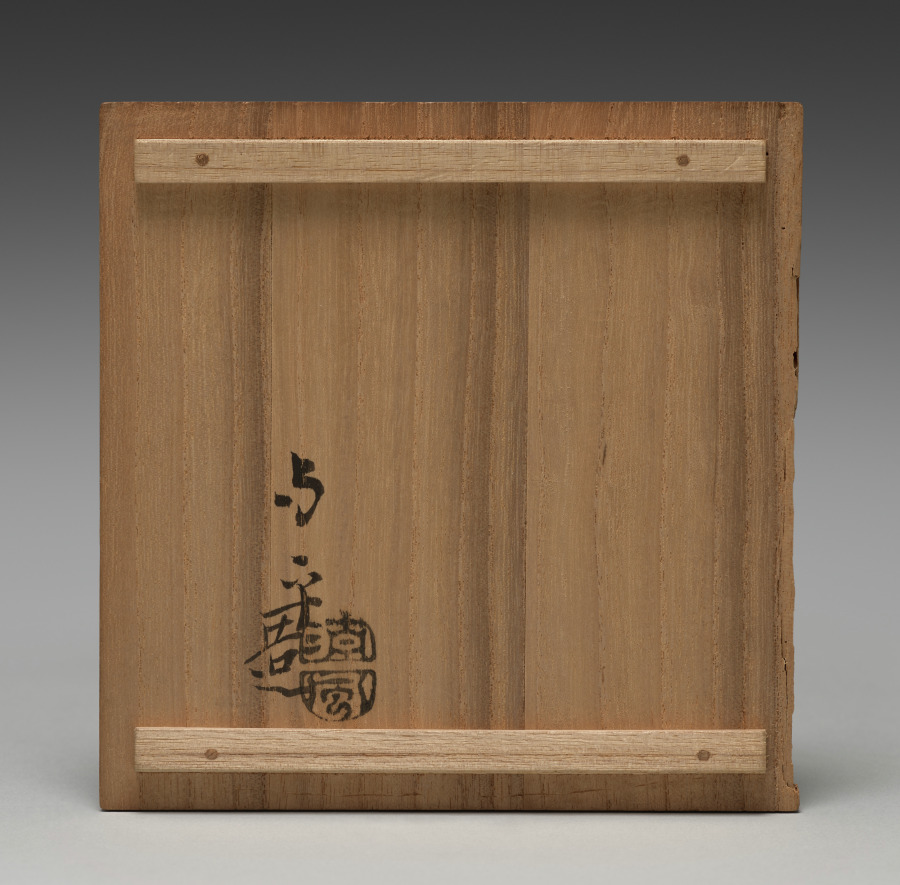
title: Box with Butterfly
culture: Japan, Meiji period (1868–1912)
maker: Seifū Yohei I (Japanese, 1801–1861)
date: 1855–57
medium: Porcelain with underglaze blue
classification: Ceramic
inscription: 清風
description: This sturdy box, with comparatively thick walls and resulting heft, is sparsely decorated with a single butterfly motif in dark underglaze blue cobalt in one corner of the lid and with repeating floral patterns along the lid and base. Single broken lines of underglaze blue define the edge of the box lid’s top where it curves to meet the sides and again where it meets the base of the box. Another blue band runs around the upper rim of the base where it meets the lip, left unglazed for a better grip of the lid when the box is closed. Yohei I’s signature on the center of the recessed base is set within a wide blue square. The porcelain box is meant to call to mind a famous story attributed to Zhuang Zhou (c. 369–286 BCE), also known as Master Zhuang, or Zhuangzi, pronounced Soji in Japanese. The second chapter of Zhuangzi, his eponymous collection of anecdotes, records the story as follows: Once, Zhuang Zhou dreamt he was a butterfly, a butterfly flitting and fluttering about, happy with himself and doing as he pleased. He didn’t know that he was Zhuang Zhou. Suddenly, he woke up and there he was, solid and unmistakable Zhuang Zhou. But he didn’t know if he was Zhuang Zhou who had dreamt he was a butterfly, or a butterfly dreaming that he was Zhuang Zhou. Between Zhuang Zhou and the butterfly there must be some distinction! This is called the Transformation of Things. The lidded box resembles kosometsuke, the porcelains in underglaze blue made to order or on speculation for the Japanese market during the early to mid-1600s in Jingdezhen, China. These works were often made from designs submitted by Japanese clients, many of whom were masters of chanoyu, who sought the wares for their tea practice. The relative roughness of the clay and the distortions in the fired object were intentional, as they created the rustic effect desired by Japanese tea communities.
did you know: It is possible that the model for this box was a smaller lidded box meant for storing incense.